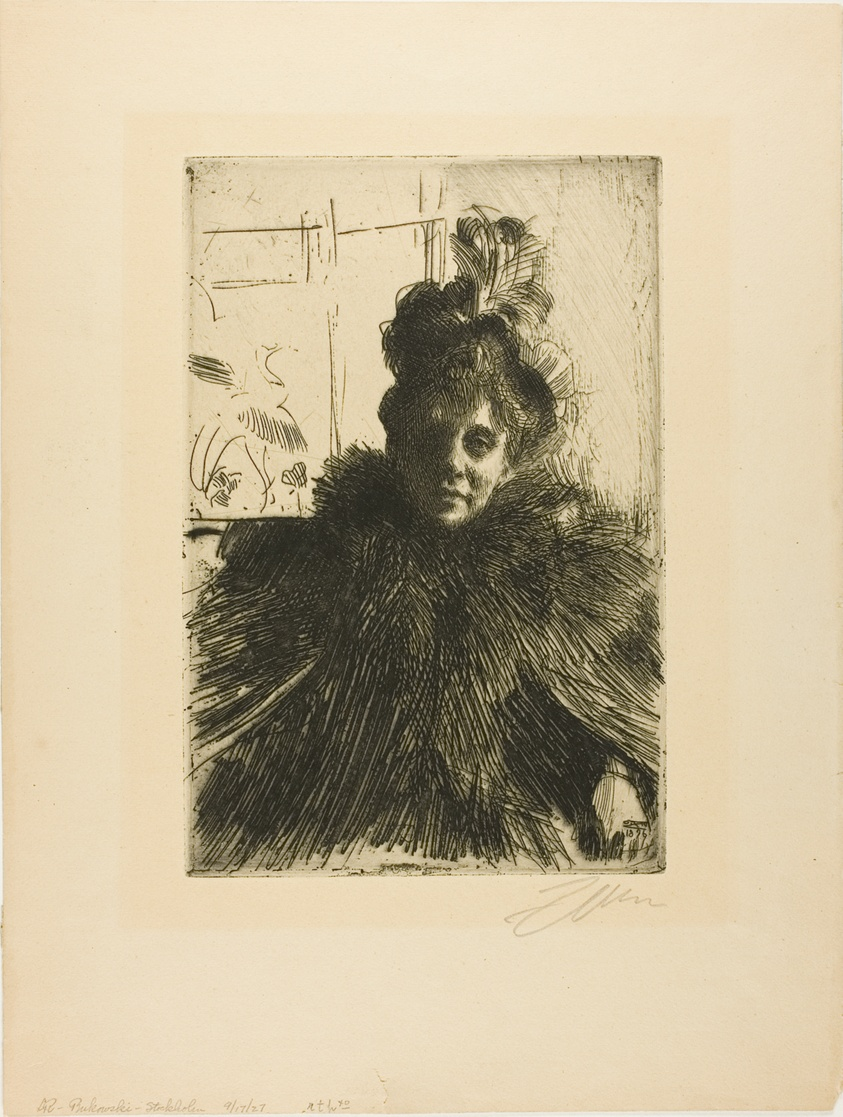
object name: Print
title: Gerda Hagborg III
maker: Anders Zorn (Swedish, 1860-1920)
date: 1896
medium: Etching on cream laid paper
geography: Sweden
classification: etching; print; prints and drawing